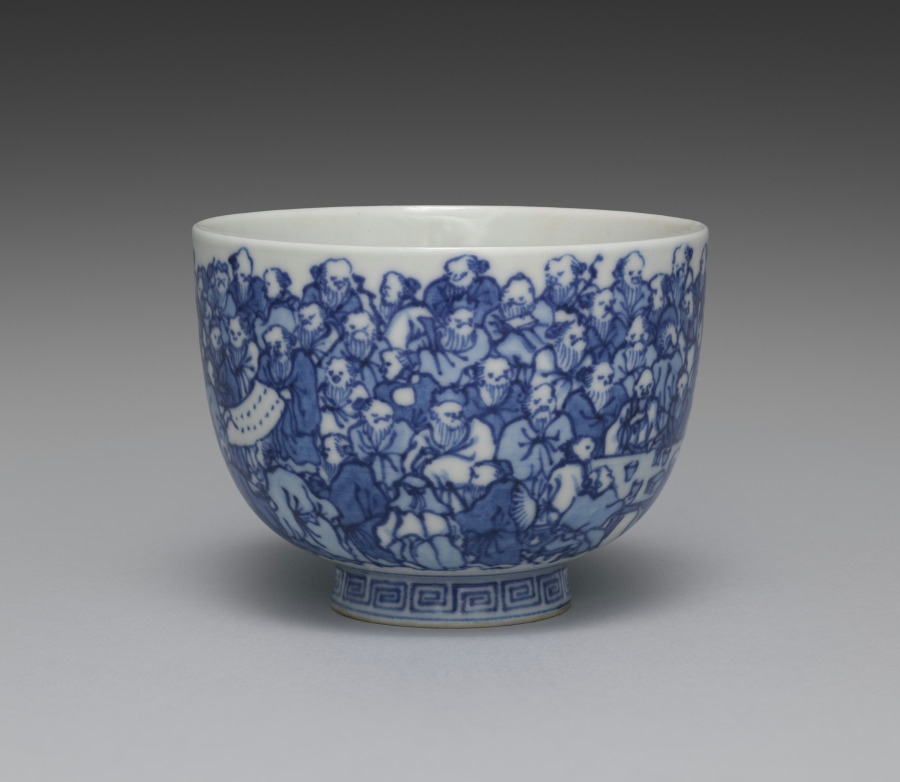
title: Teacup from Teacups with a Hundred Sages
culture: Japan, Meiji period (1868–1912)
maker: Seifū Yohei III (Japanese, 1851–1914)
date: 1893–1914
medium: One from a set of five teacups; porcelain with underglaze blue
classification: Ceramic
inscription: 清風造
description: Each of these five teacups has a painting of identical design in underglaze blue, but as the tiny figures are drawn entirely by hand, each cup has its own personality. The theme of the sencha cups is an assembly of sages or immortals, literally “a hundred venerable [people]” (hyakurō). The myriad figures crowd the scene in groups. The god of longevity, with his tall forehead, sits with his cranes, having flown in from Mt. Penglai on the Isle of the Immortals. Seven long-bearded sages sit around a stone table, chatting and drinking; one is seated on an enormous gourd. Of course, there is a stack of books on the table, and elsewhere, scrolls are being written upon or read—in one case held very close by a sage who is wearing glasses. The design was enormously popular in ceramics made for those engaged in literati culture.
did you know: Seifū Yohei III (1851–1914) produced many works for tea gatherings where people drank Chinese-style leaf-tea (sencha).